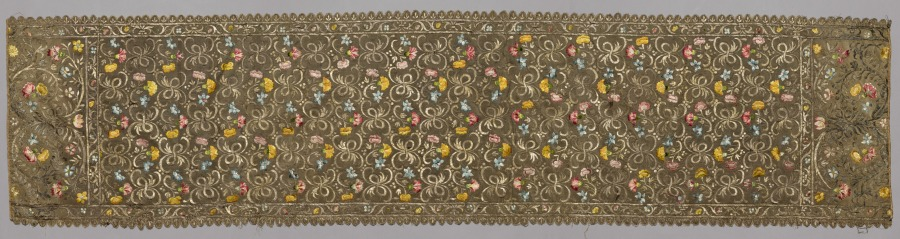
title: Panel, Probably from a Christening Mantle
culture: Italy, late 16th century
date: late 1500s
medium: Silk, gold thread; embroidery: couching, stem, long, and short stitches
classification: Embroidery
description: This panel is likely from a christening mantle, a decorative shawl or cape worn during the procession at a christening. This example features radiant gold thread enhanced with eight vibrant colors of shiny silk thread that create a delicate pattern of blossoms issuing from ornate stems. The decoration forms the main field and two end sections bordered by foliate motifs.